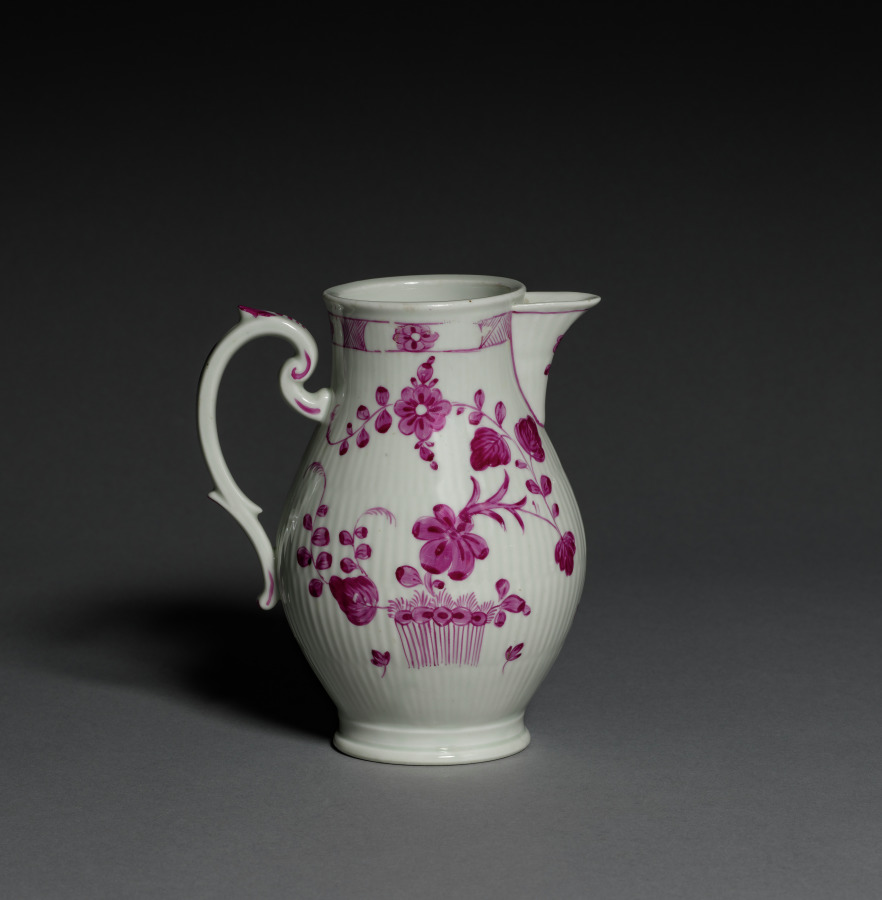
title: Chocolate Pot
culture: Germany, Berlin, late 18th century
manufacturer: Royal Porcelain Manufactory, Berlin (German)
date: late 1700s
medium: porcelain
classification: Ceramic